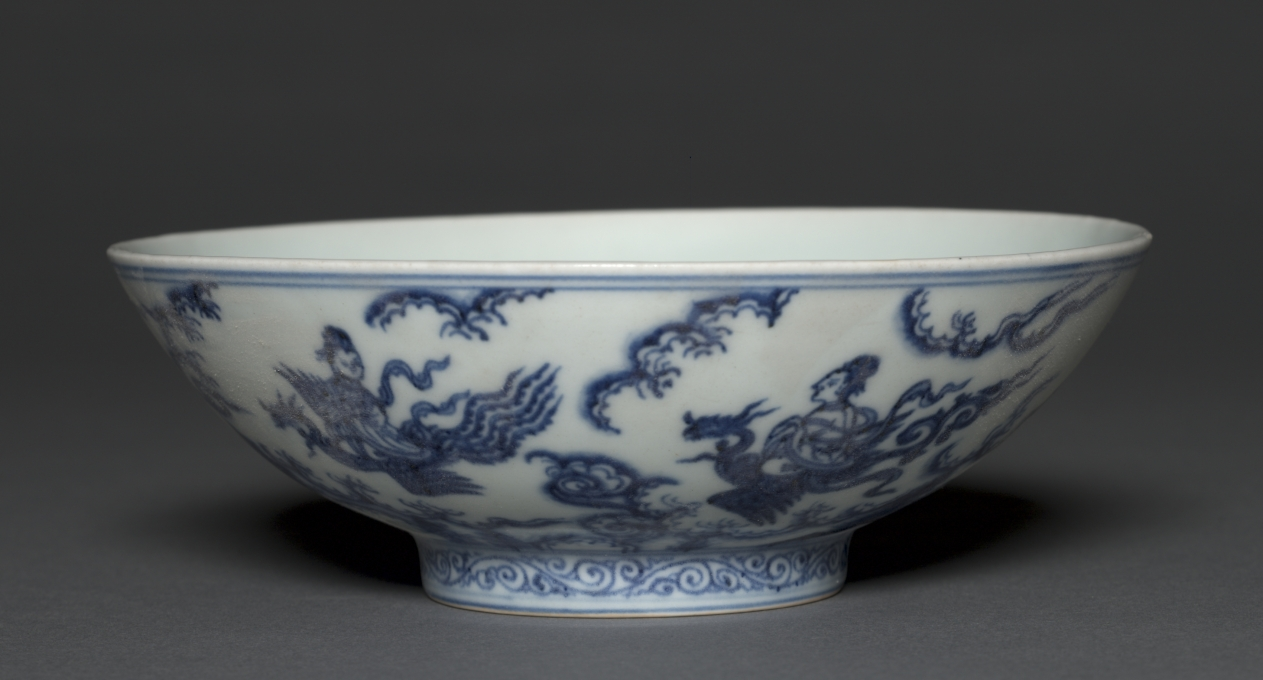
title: Bowl with "Land of Daoist Immortals" Scene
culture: China, Ming dynasty (1368-1644), Xuande mark and reign (1426-35)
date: 1426–35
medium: porcelain with underglaze blue decoration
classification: Ceramic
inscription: 大明宣德年製